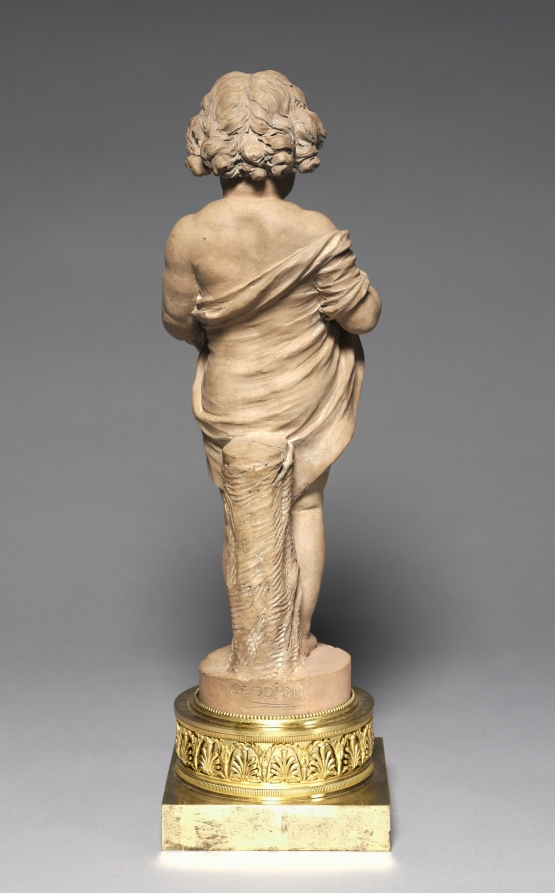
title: Child Carrying Fruit and Flowers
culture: France, 18th century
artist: Clodion (French, 1738–1814)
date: 18th-early 19th century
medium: terracotta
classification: Sculpture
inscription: Signed: "Clodion"; signature incised on back in the terracotta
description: French sculptor Claude Michel, called Clodion, frequently depicts children in his sculpture, in this case a convincing toddler, from her pout to her plump toes. The piece is constructed in terracotta, a common medium for Clodion. After firing, the unglazed color of the clay can vary widely; each of Clodion's statues has a slightly different hue. The figure has sustained a number of damages, but has recently been cleaned and repaired.